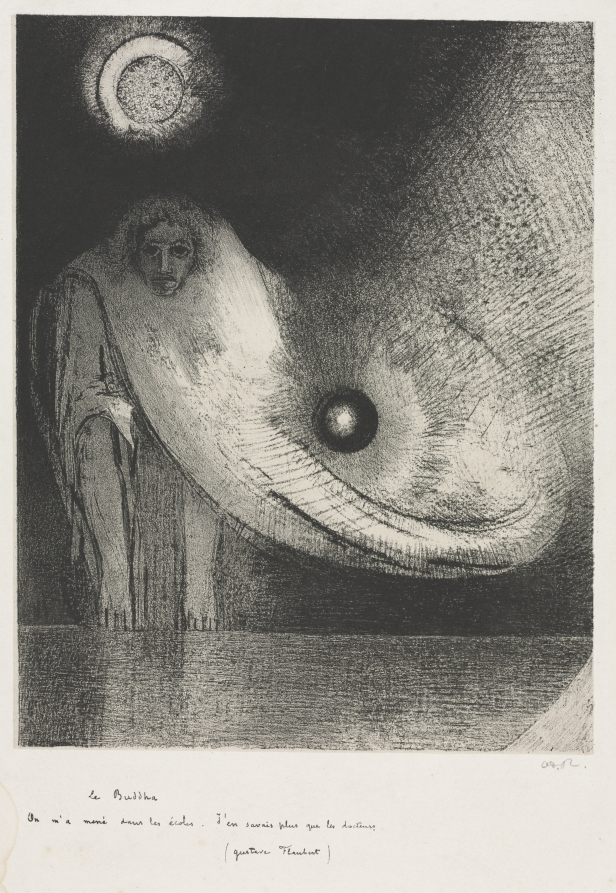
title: The Buddha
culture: France, 19th century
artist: Odilon Redon (French, 1840–1916)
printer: Auguste Clot (French, 1858–1936)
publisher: Andre Marty (French, b. 1857)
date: 1895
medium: lithograph on China paper laid on wove paper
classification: Print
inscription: Inscribed on stone, below image: Buddha / On m'a mené dans les écoles. J'en savais plus que les docteurs. / (Gustave Flaubert); signed at lower right, below image, in graphite: Od. R.